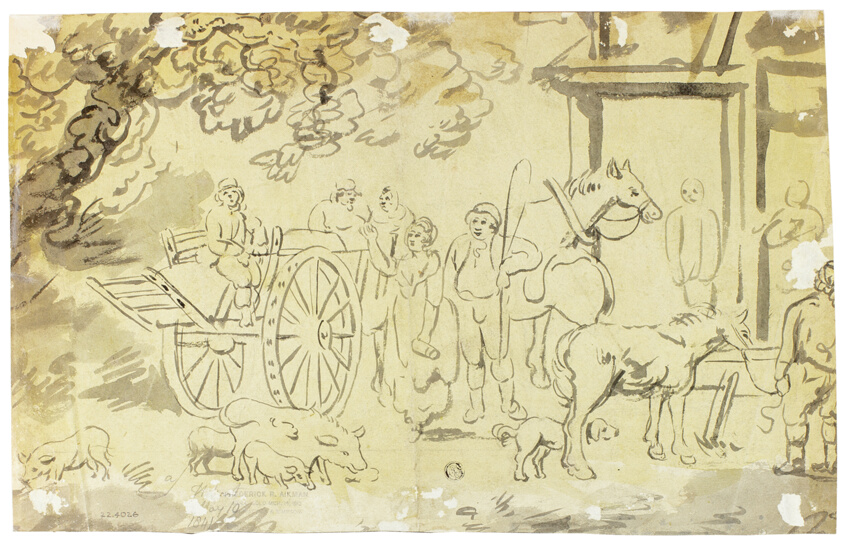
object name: Drawing and Watercolor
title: Raising of Lazarus (recto); Travelers with Cart Outside Inn (verso)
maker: Unknown Artist (German, 18th century); after Giovanni Benedetto Castiglione (Italian, 1609-1664)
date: 1700/99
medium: Pen and black ink, and red chalk, with brush and gray wash (recto), and brush and black ink and black wash (verso), on cream wove paper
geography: Germany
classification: ink or chalk wash; drawings (visual works); prints and drawing